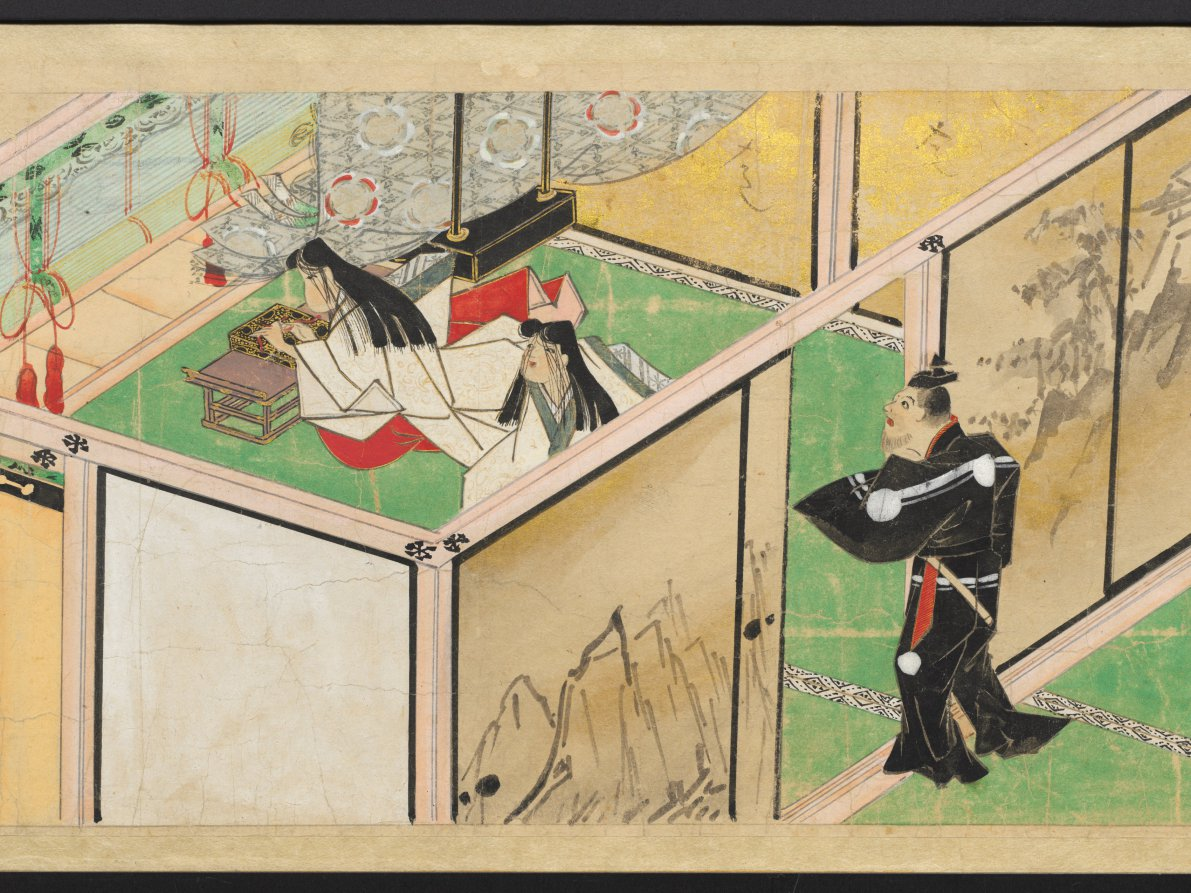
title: The Saltmaker's Story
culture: Japan, Edo period (1615–1868)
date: early 1600s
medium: One of a pair of handscrolls; ink, color, and gold on paper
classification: Painting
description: Once read and copied by girls at New Year’s celebrations and included in dowries, The Saltmaker’s Story is a rags-to-riches tale in which daughters are gifts from the gods. Despite his simple outlook, the main character progresses from humble roots as an associate at Kashima Shrine to the elite status of grandfather of the emperor through the intervention of the Kashima deity. The Saltmaker’s Story is traditionally presented in a set of three scrolls, but the text of this set has been removed by a previous owner, who remounted the illustrations as a pair. The paintings of this one take us from right to left through the second half of the tale.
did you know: This handscroll originally had texts before its paintings, but the texts were removed.